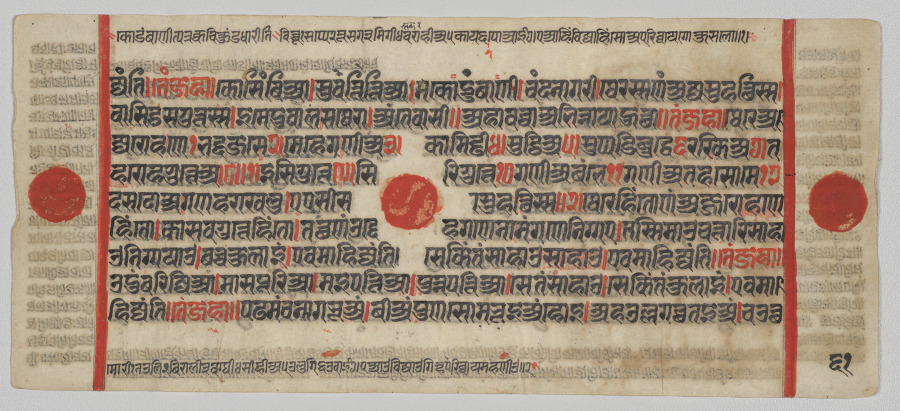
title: Text, Folio 61 (verso), from a Kalpa-sutra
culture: Western India, Gujarat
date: c. 1475–1500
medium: Gum tempera, ink, and gold on paper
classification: Painting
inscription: [[recto, beginning with line 1]] ṇīo ahāvaccā abhinnāyā hutthā || taṁ jahā || Jakkhā ya Jakkhadinnā Bhūā taha hoi Bhūadinnā ya | [line 2] *Seṇā *Veṇā Reṇā* | bhaïṇīo Thūlabhaddassa || 1 || therassa ṇaṁ ajja-Thūlabhaddassa | goama-saguttassa | i- [line 3] me do therā | aṁvevāsī [=aṁtevāsī] || ahāvaccā a|bhinnāyā hutthā || taṁ jahā || there ajja-Mahāgirī | elā- [line 4] vacca-sagutte | there ajja-Suhatthī | vāsi||ṭṭha-sagutte | therassa ṇaṁ ajja-Mahāgirissa | elāvacca- [line 5] –saguttassa | ime aṭṭha there | aṁte||vāsī || ahāvaccā abhinnāyā hutthā || taṁ ja- [line 6] hā || there Uttare | there Balissahe | there | Dhaṇaḍḍhe | there Siriḍḍhe | there Koḍinne | Nāge | Nā- [line 7] gamitte | *there *Chulie* | Rohagutte | kosia-gutte ṇaṁ | therehiṁto ṇaṁ Chuliehiṁto | Rohagutte- [line 8] hiṁto | *kosia*-gutte*hiṁto | *tattha ṇaṁ *Terāsiā sāhā* niggayā* | therehiṁto ṇaṁ Uttara-Balissa- [line 9] hehiṁto | tattha ṇaṁ Uttara-Balissahe nāmaṁ gaṇe niggae | tassa ṇaṁ imāo cattāri sāhāo | evam=āhi-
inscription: [[verso, beginning with line 1]] jjaṁti || taṁ jahā | kosiṁbiā | suvattittiā | ma *koḍuṁbāṇī* | caṁdanāgarī | therassa ṇaṁ ajja-Suhatthissa | [line 2] vāsiṭṭha-saguttassa | ime duvālasa therā | aṁtevāsī || ahāvaccā abhinnāyā hutthā || taṁ jahā | there a| [line 3] jja-Rohaṇe 1 Bhaddajase 2 | Mehe gaṇī a 3 | Kāmiḍḍhī 4 | Suṭṭhia 5 | Suppaḍibuḍḍha 6 Rakkhia 7 | ta- [line 4] ha Rohagutte a | 8 || 1 | Isigutte 9 || Sirigutte 10 gaṇī a Baṁbhe 11 gaṇī a taha Some 12 [line 5] dasa do a gaṇaharā khalu | ee sīsā Suhatthissa || 2 | therehiṁto ṇaṁ ajja-Rohaṇe- [line 6] hiṁto | kāsava-guttehiṁto | tattha ṇaṁ uddehagaṇe nāmaṁ gaṇe niggae | tass’imāo cattāri sāhā- [line 7] o niggayāo | cha=cca kulāiṁ | evaṁ āhijjaṁti | se kiṁ taṁ sāhāo sāhāo | evam=āhijjaṁti || taṁ jahā || [line 8] uḍuṁbarijjiā | māsapūriā | maïpattiā | punnaputtiā | se taṁ sāhāo | se kiṁ taṁ kulāiṁ | evam=ā| [line 9] hijjaṁti || taṁ jahā || paḍhamaṁ ca nāgabhūaṁ | bīaṁ puṇa somabhūiaṁ hoi | aha ullagaccha taïaṁ | caüttha-